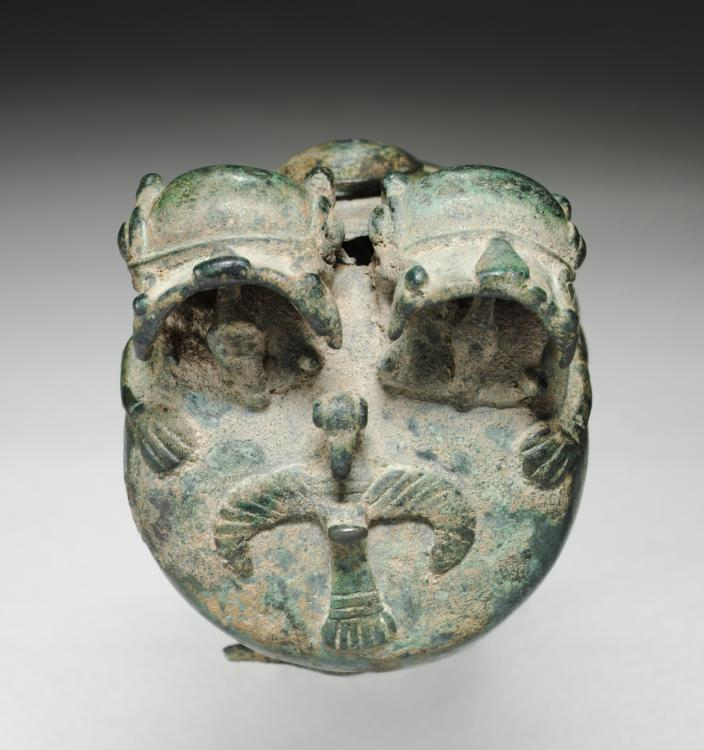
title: Axel Shaft Cup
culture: Iran, Luristan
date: c. 800–700 BCE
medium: bronze, cast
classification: Metalwork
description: Luristan, on Iran's western frontier, and Markik and Amlash in the north were sites of flourishing civilizations. However, since Luristan left little in the way of written records, all that we know about it has been guessed from their works of art. One of the ancient centers of the horse-breeding industry, Luristan is best known for its bronze objects, many of them horse or chariot trappings. Luristan supplied the Assyrian Empire not only with horses but also the hardware associated with them.